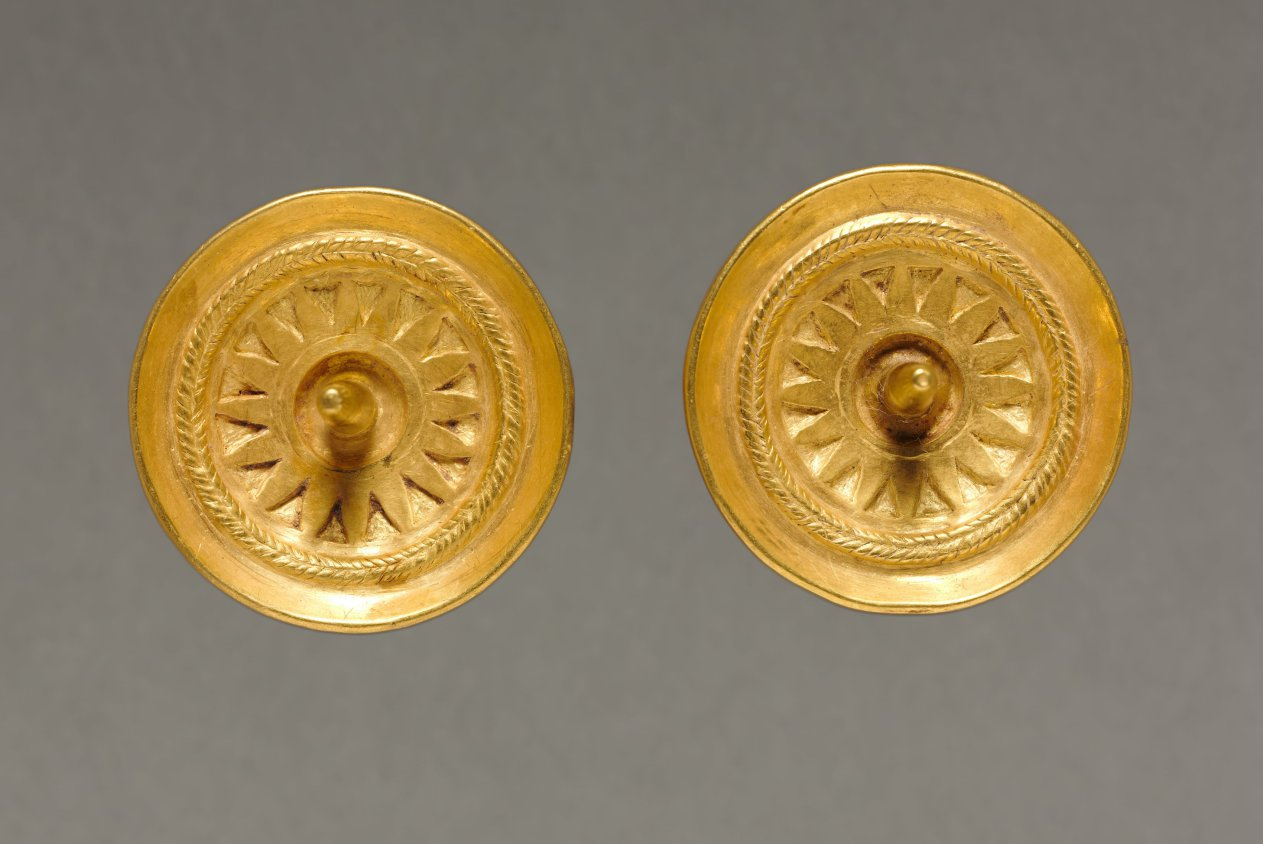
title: Ear Spool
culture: Panama, Conte style, 5th - 10th century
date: c. 400–900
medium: hammered gold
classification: Metalwork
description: Harvard archaeologists excavated the eight ornaments in this case from several burials at Sitio Conte, a cemetery famous for its lavish graves of powerful chieftains. The young man buried in Grave 26 was such a chief. His status was stunningly memorialized by 21 human companions and 475 objects, many of them personal ornaments made of gold, including the large chest plaque (no. 2) and the rod-shaped ear ornament (no. 3) shown here. The creature on the chest plaque, found close to the chief’s body, has reptile claws and perhaps the head crest of an iguana. Its meaning is unknown but perhaps, as in later periods, reptilian imagery and the warm gleam of gold linked rulers with the sun’s creative force.